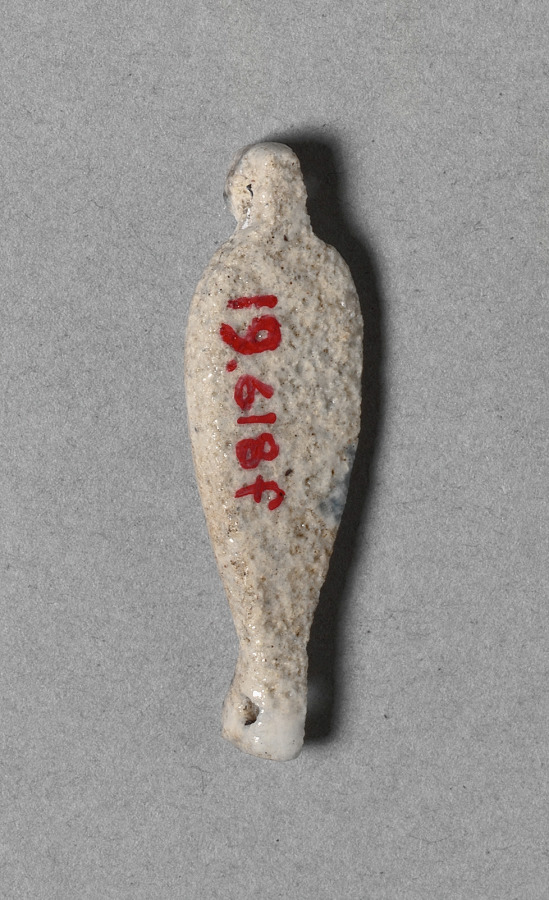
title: Petal-Shaped Bead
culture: Egypt, New Kingdom (1540–1069 BCE), Dynasty 18, reign of Amenhotep III (1390–1352 BCE)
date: c. 1391–1353 BCE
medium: faience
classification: Jewelry